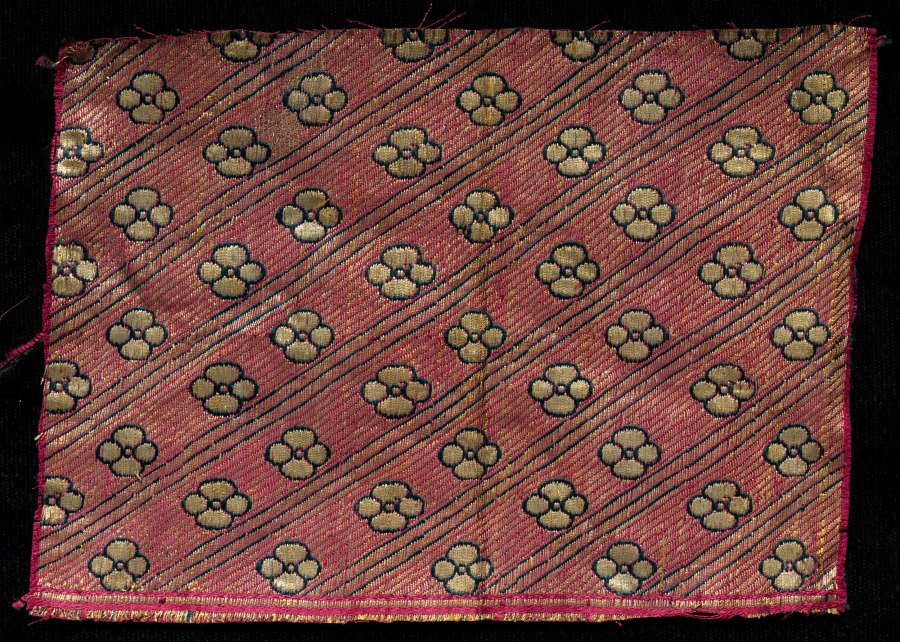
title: Fragment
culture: India, 19th century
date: 1800s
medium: brocade, "kimkhwab"; silk and gold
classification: Textile